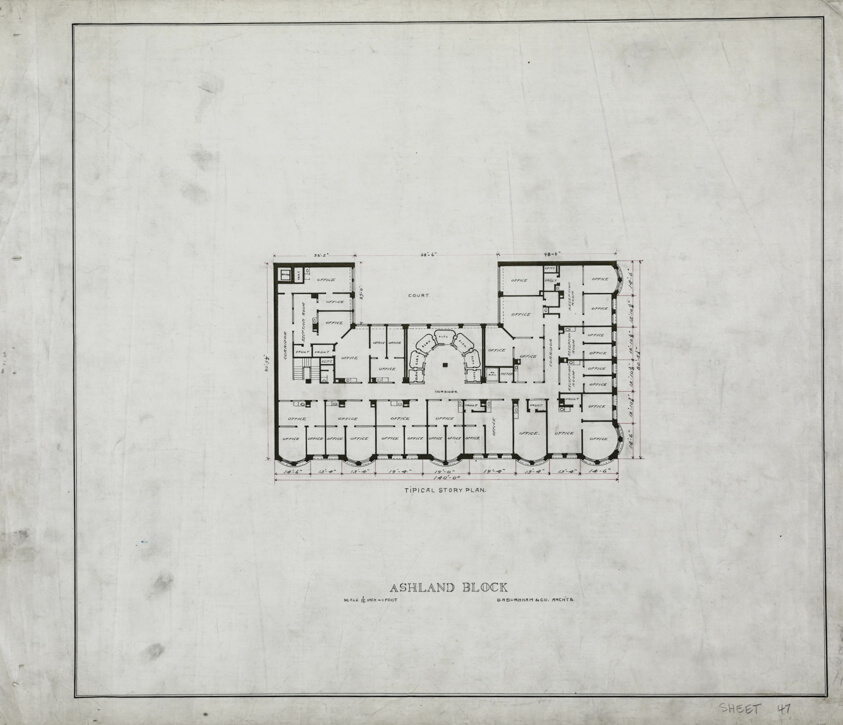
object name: Architectural Drawing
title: Ashland Block, Chicago, Illinois, Floor Plans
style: 19th century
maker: D.H. Burnham & Company; American, 1891–1912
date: c. 1892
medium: Black and red ink on linen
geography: Chicago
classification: architectural drawing; architecture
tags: Chicago, architecture